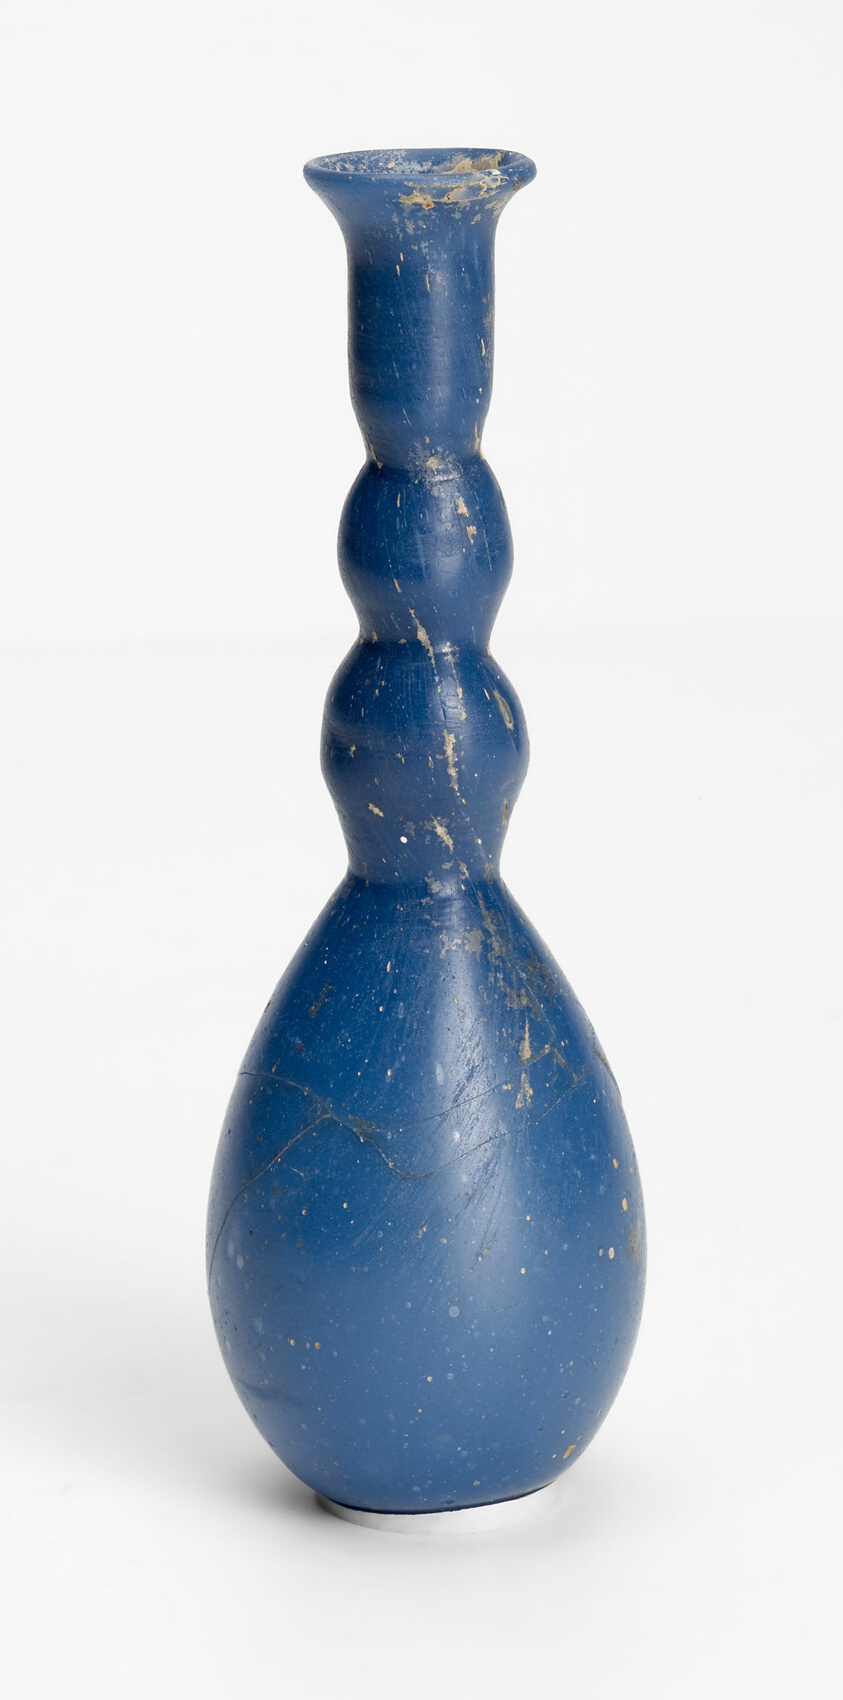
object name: Vessel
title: Bottle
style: roman (ancient, style or period), ancient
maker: Roman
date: 1st-2nd century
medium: Glass, blown technique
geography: Roman Empire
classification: bottle; glass; vessel; ancient art